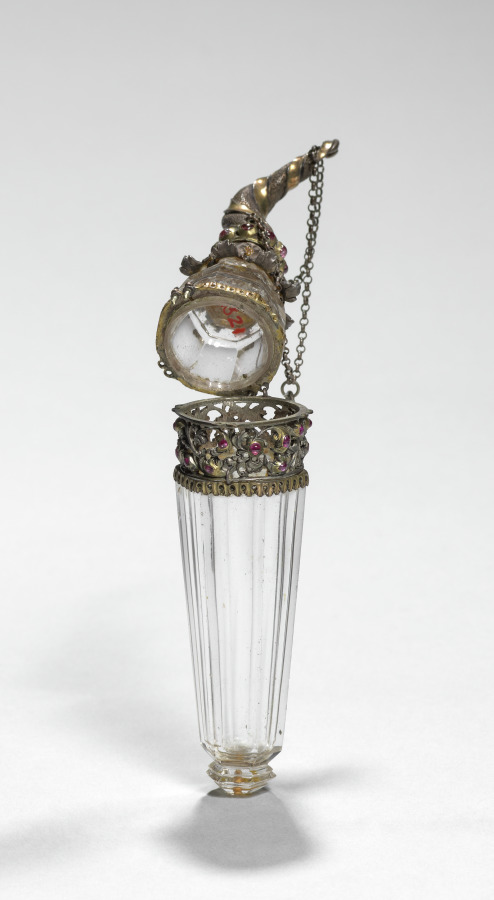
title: Scent Bottle (Vinaigrette)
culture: France, 19th century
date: 1800s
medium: glass mounted in silver (?) partially gilt and set with pink cabochon stones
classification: Miscellaneous